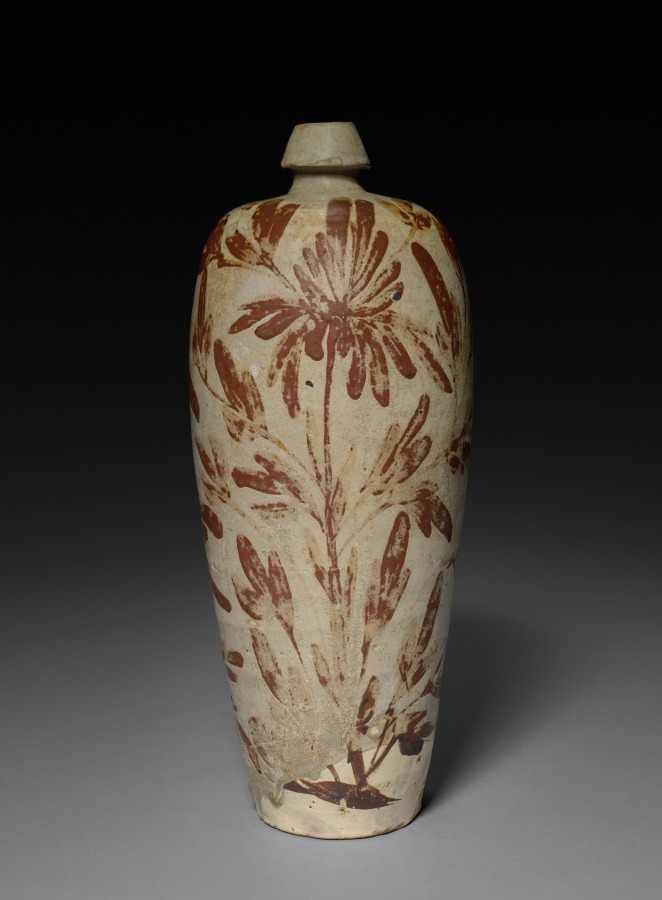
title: Vase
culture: China, Northern Song dynasty (960–1127)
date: 1100s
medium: Buff stoneware with underglaze slip coating, Cizhou ware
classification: Ceramic